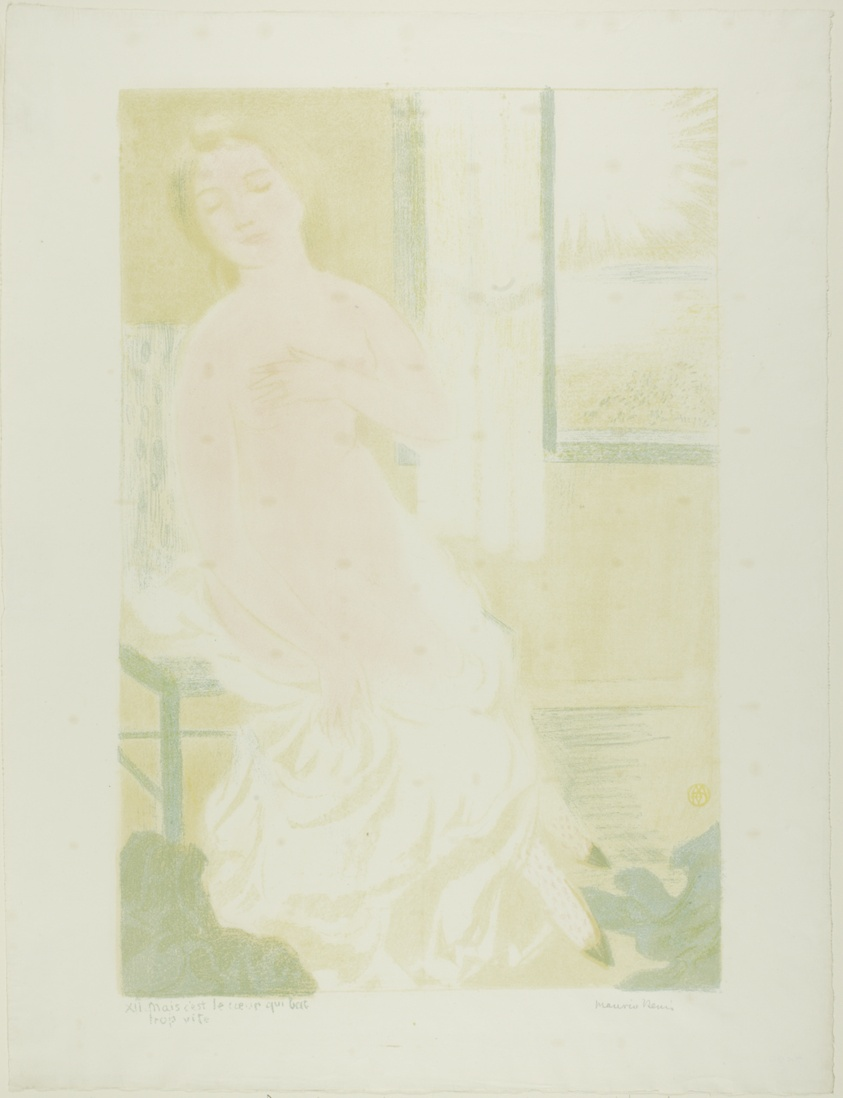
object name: Print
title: But It is the Heart That Beats Too Quickly, plate twelve from Love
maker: Maurice Denis (French, 1870-1943); published by Ambroise Vollard (French, 1867-1939)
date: 1898, published 1899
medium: Lithograph in yellow-green, pink, and blue on light ivory wove paper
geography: France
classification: lithograph; print; prints and drawing